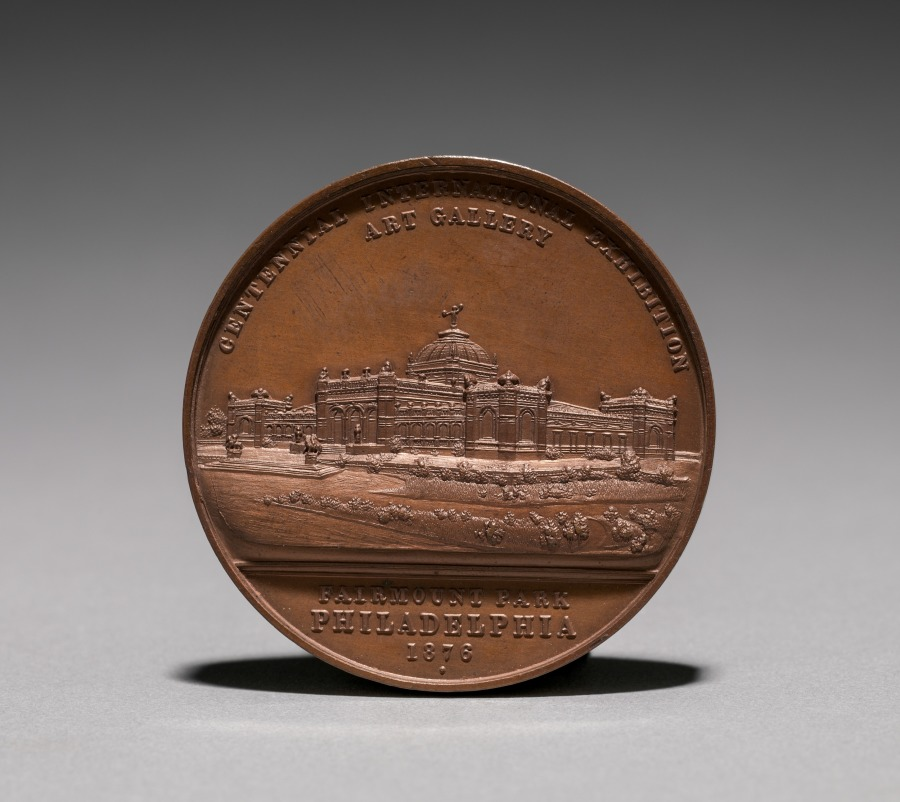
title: Medal: Commemorating the Centennial International Exhibition, 1876 (obverse)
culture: America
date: 1876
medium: bronze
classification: Metalwork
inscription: Centennial International Exhibition Art Gallery - Fairmont Park Philadelphia, 1876.